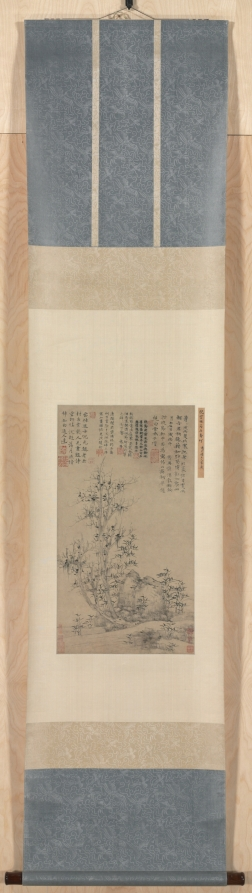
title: Bamboo, Rock, and Tall Tree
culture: China, Yuan dynasty (1271–1368)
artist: Ni Zan (Chinese, 1301–1374)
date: c. 1300s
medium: hanging scroll; ink on paper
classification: Painting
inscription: Artist's inscription, signature, and seal: Windy and rainy days - what a chilly wheat-harvesting season,/ With brush in hand, I fight depression by copying./ Fortunately, I can depend upon you, my friend, to send me consolation -/ "Pine-lard" wind, and meat with bamboo shoots that never fail to awaken appetite./ Yunlinzi, Zan. [seal] Ziyiyue.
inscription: 4 additional inscriptions and 14 additional seals: 1 poem and 3 seals, possibly of Chang Yü (1277–1350); 1 poem and 1 seal of Yüan Hua (1316–end of 14th c,); 1 poem and 2 seals of Lu P'ing (1438–1521); 1 seal of Liang Qingbiao 梁清標 (1620–1691); 1 poem and 1 seal of Chao Yü (1638–1713); 1 seal of ? Jen-lan (dates unknown); 2 seals of Gu Wenbin 顧文彬 (1811–1889); 1 seal of C. C. Wang 王季遷 (1907–2003); 2 seals unidentified.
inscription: Poem possibly by Chang Yü: The Daoist of the Cloudy Forest, Ni Yuanzhen,/ How many people can enjoy a fame in old age like yours?/ Seeing the painting, I wrote the poem in fond memories./ I feel as if I am bathed in the light of the fading moon/ Which shines on your spirit as always.